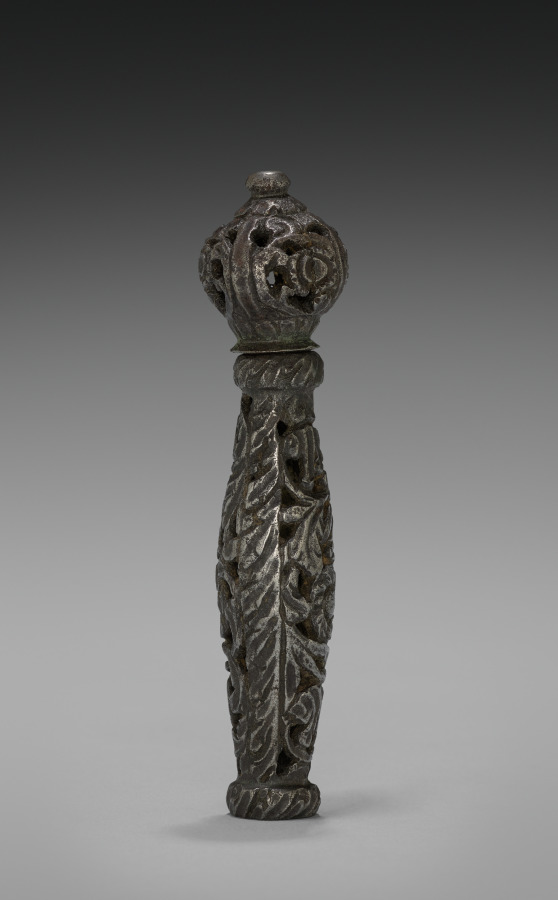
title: Pommel and Grip of Dress Sword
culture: Italy, 17th century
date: 1600s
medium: steel, chiseled, chased, and pierced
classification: Arms and Armor